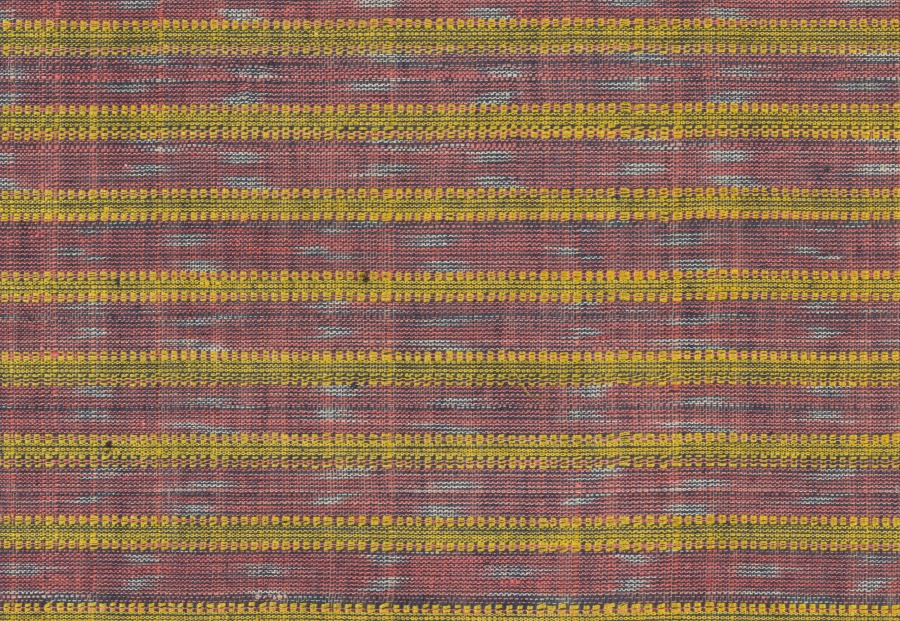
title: Fragment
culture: India, late 19th century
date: late 1800s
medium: silk and cotton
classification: Textile